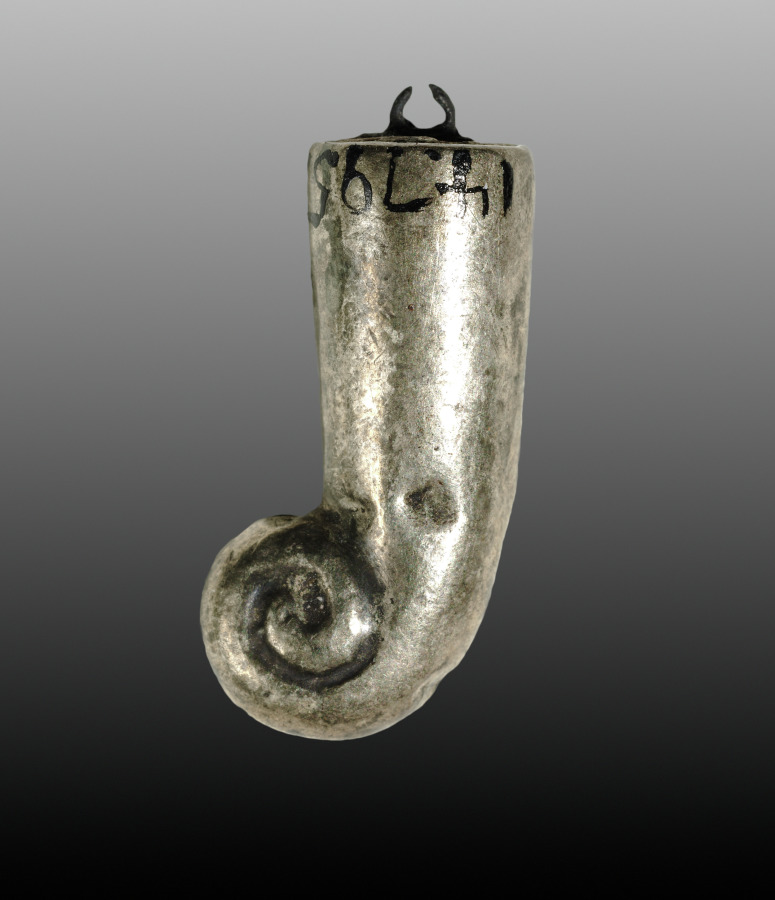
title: Sidelock (one of a pair)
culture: Egypt, Middle Kingdom (2040–1648 BCE), Dynasty 12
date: 1980–1801 BCE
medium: Electrum (?) over a calcite gesso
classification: Jewelry